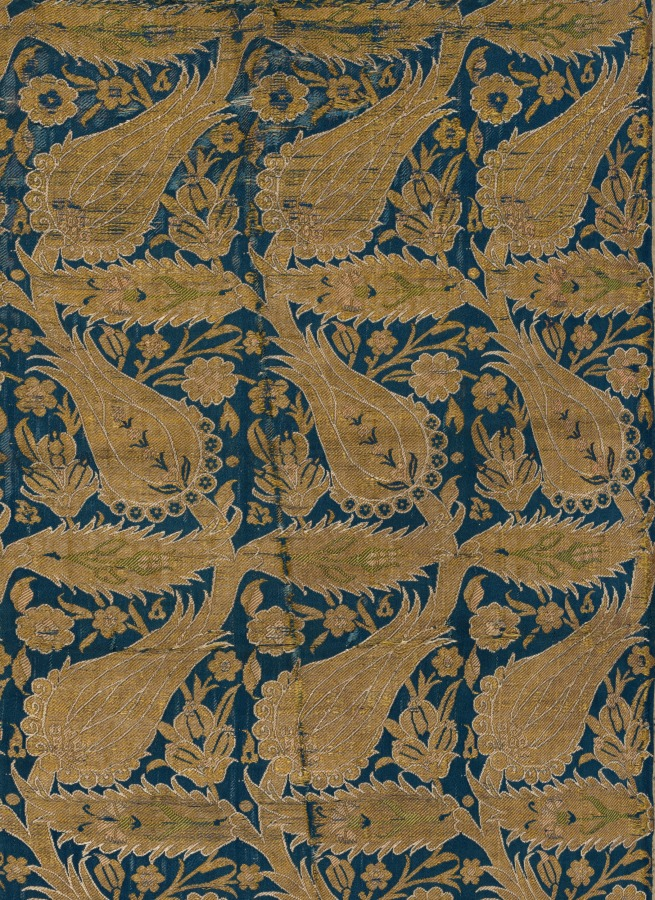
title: Lampas with compressed undulating vines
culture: Turkey, Bursa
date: early 1600s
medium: lampas: silk and gilt-metal thread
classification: Textile